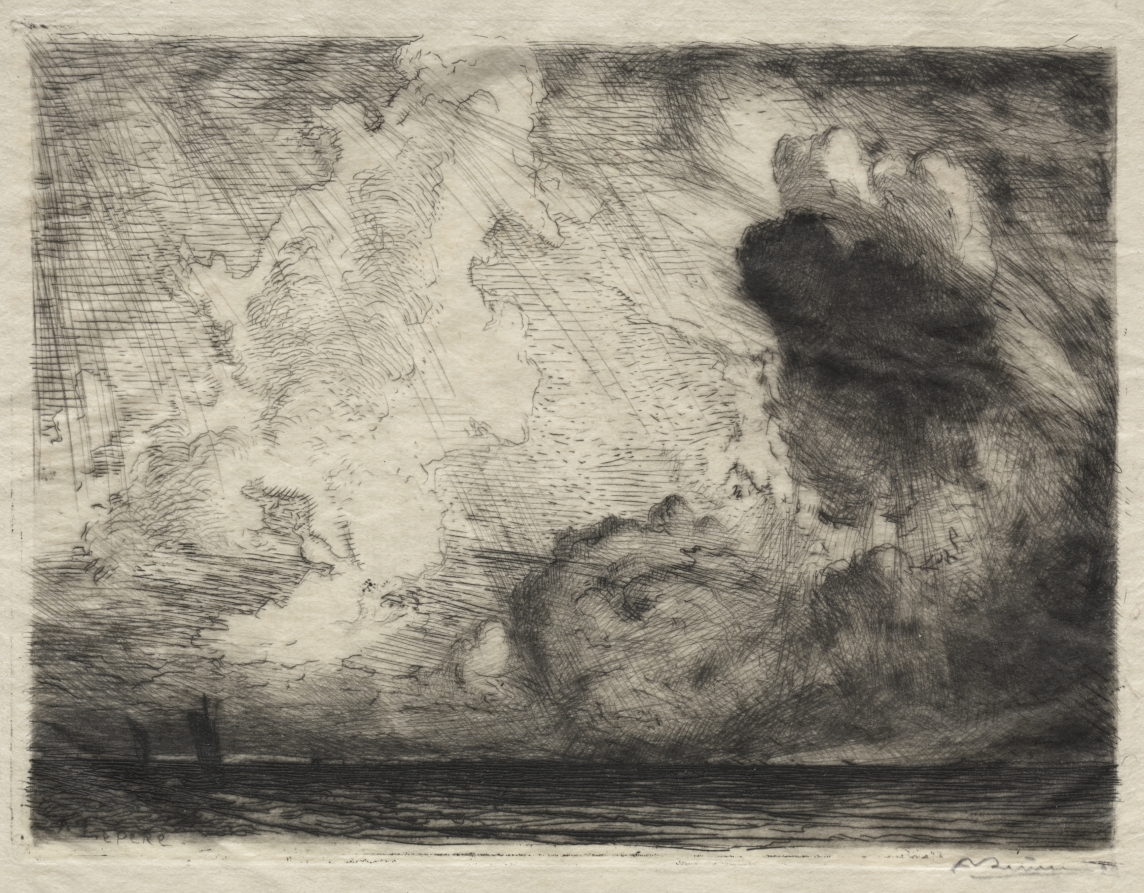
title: Seascape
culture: France, 20th century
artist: Auguste Louis Lepère (French, 1849–1918)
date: 1911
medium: etching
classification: Print